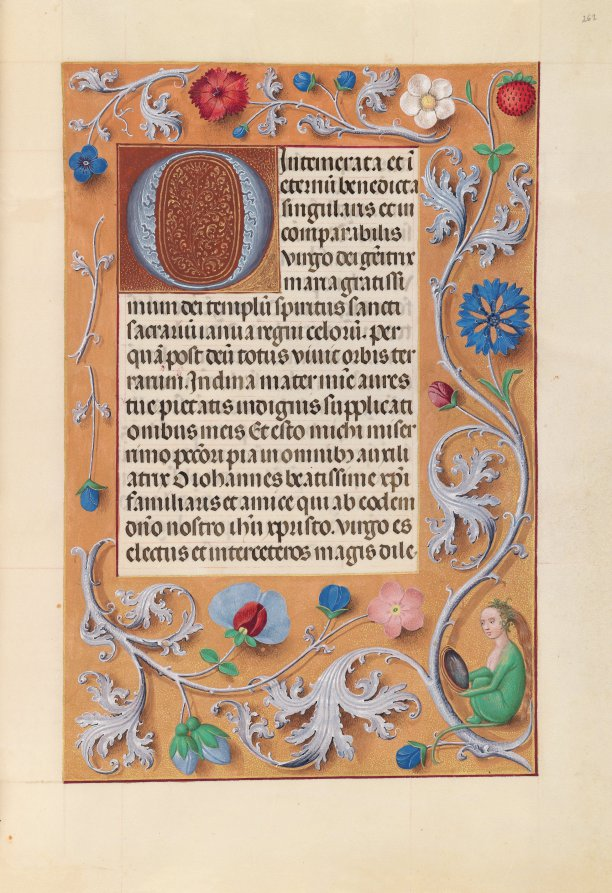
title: Hours of Queen Isabella the Catholic, Queen of Spain: Fol. 262r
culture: Flanders, Ghent and Bruges, late 15th century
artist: Master of the First Prayerbook of Maximillian (Flemish, c. 1444–1519)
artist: and Associates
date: c. 1500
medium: ink, tempera, and gold on vellum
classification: Bound Volume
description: This manuscript was illuminated by a circle of at least five highly organized manuscript painters active in the Flemish cities of Ghent and Bruges. The principal illuminator was Alexander Bening, who painted the majority of the book's miniatures. Manuscripts produced by this circle of artists are renowned for the decoration of their borders, which typically feature a rich variety of realistically-painted flowers, birds, and butterflies. This prayer book, called a book of hours, was intended not for a cleric, but for the private devotions of a lay person-in this case, Isabella the Catholic, Queen of Spain (1451-1504). Isabella's coat of arms embellishes the book's frontispiece. It is unlikely that the book was commissioned by the Queen herself; rather, she probably received it as a diplomatic gift from someone courting her patronage, perhaps Cardinal Francisco Jimenez de Cisneros. A Franciscan friar, Jimenez was dependent upon Isabella for his advancement, first to the post of Queen's confessor in 1492, and then to Archbishop of Toledo in 1495.